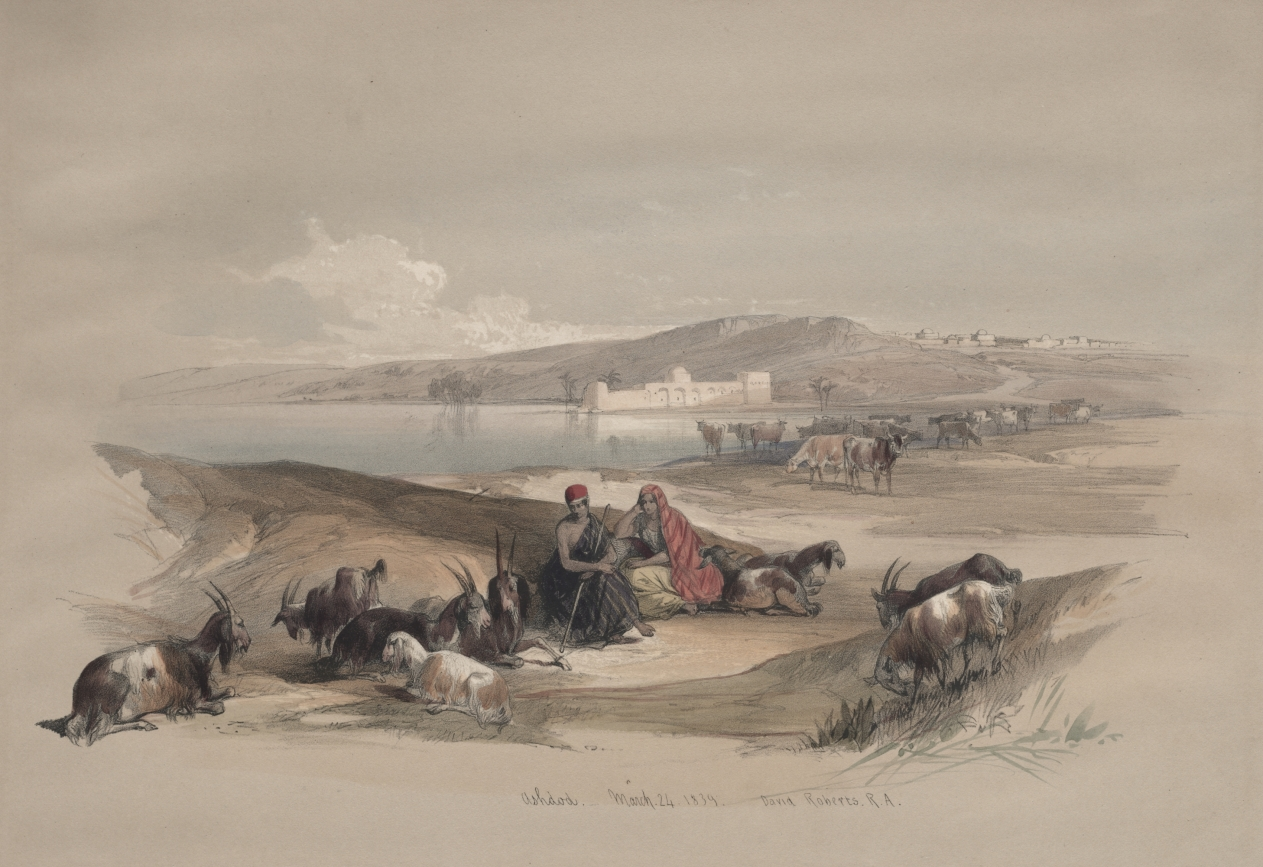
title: Ashdod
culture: England, 19th century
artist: David Roberts (Scottish, 1796–1864)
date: 1839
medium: color lithograph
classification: Print